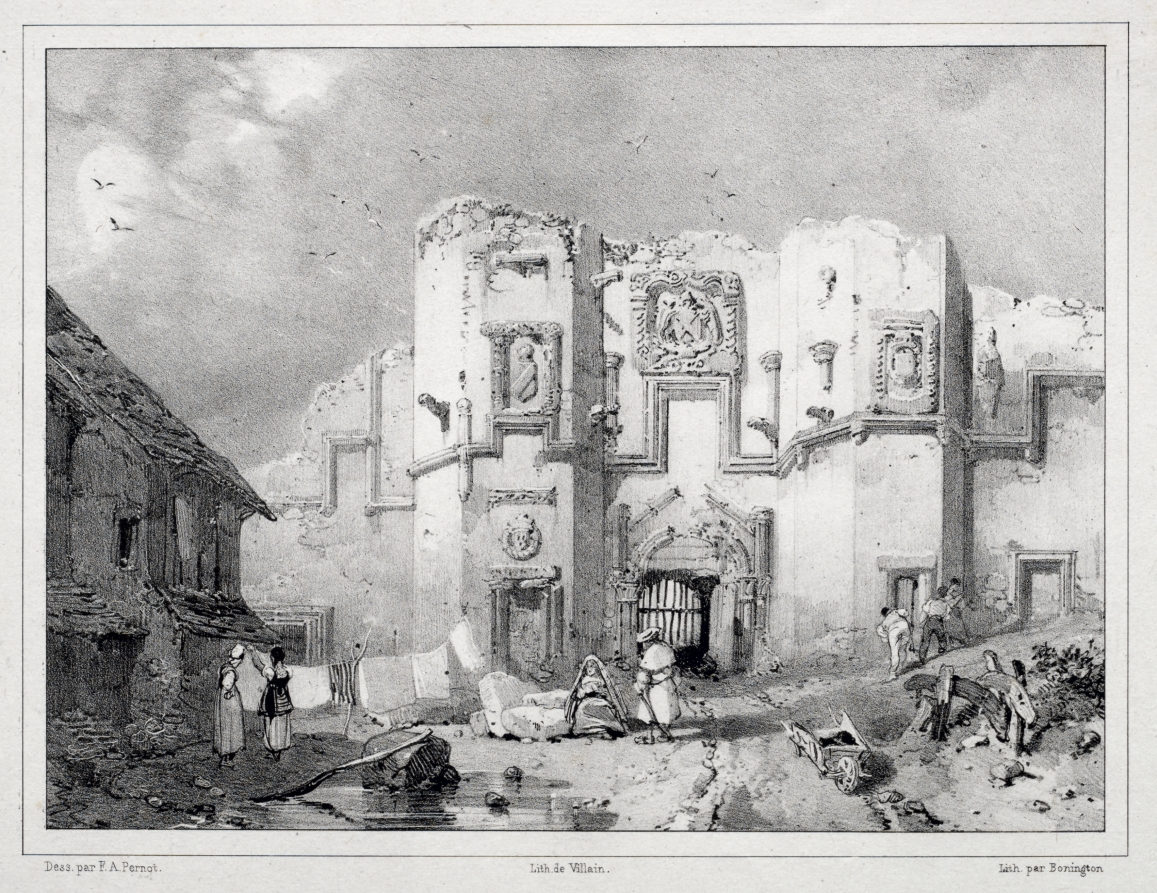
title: Old Gateway at Stirling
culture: England, 19th century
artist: Richard Parkes Bonington (British, 1802–1828)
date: 1826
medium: lithograph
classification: Print